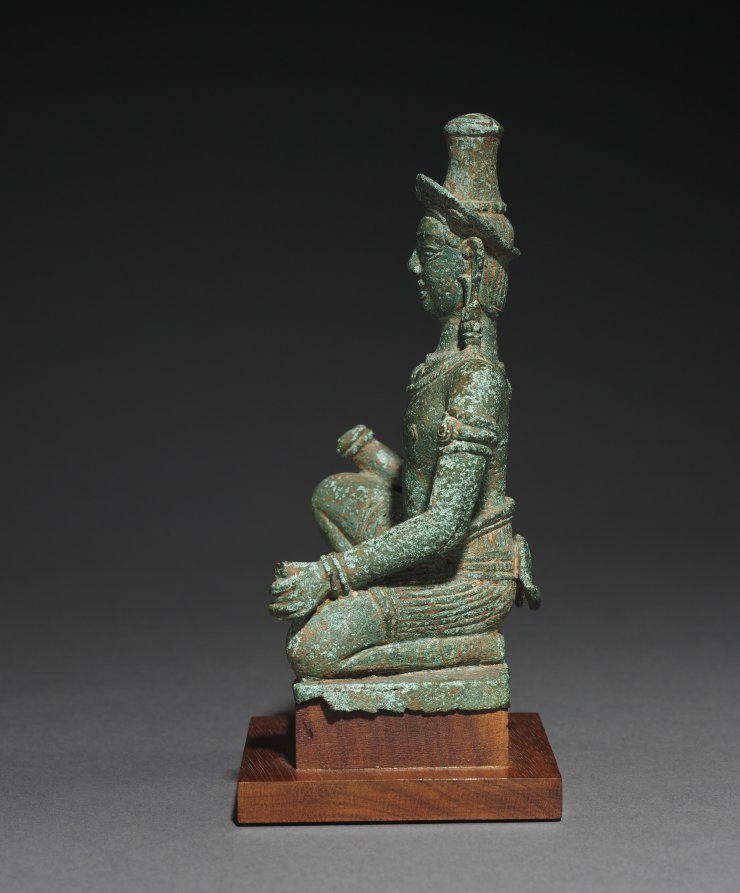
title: Kneeling Worshipper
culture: Cambodia, Angkor Wat style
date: 1100s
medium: bronze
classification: Sculpture